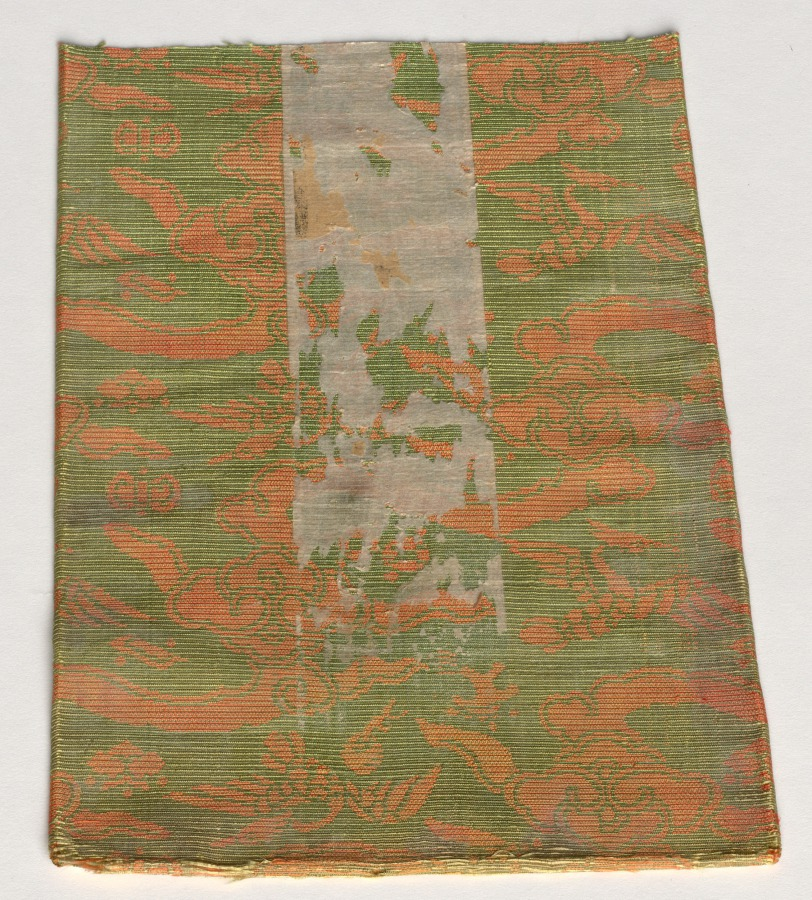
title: Book Cover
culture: China, Qing dynasty (1644-1911)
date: 1680–1720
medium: silk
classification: Textile